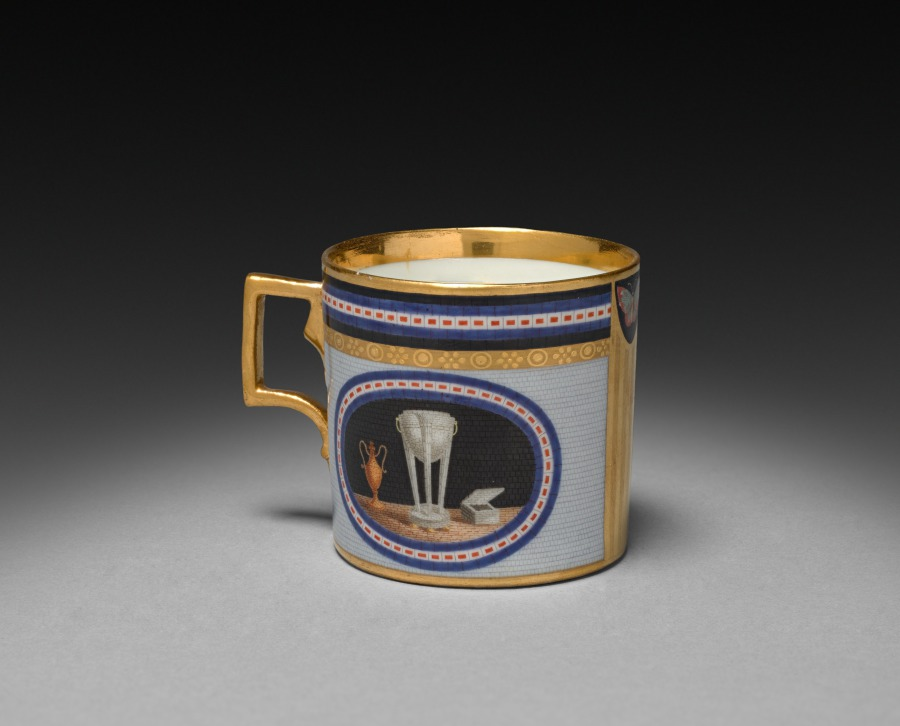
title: Cup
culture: Austria, Vienna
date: c. 1800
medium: porcelain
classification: Ceramic